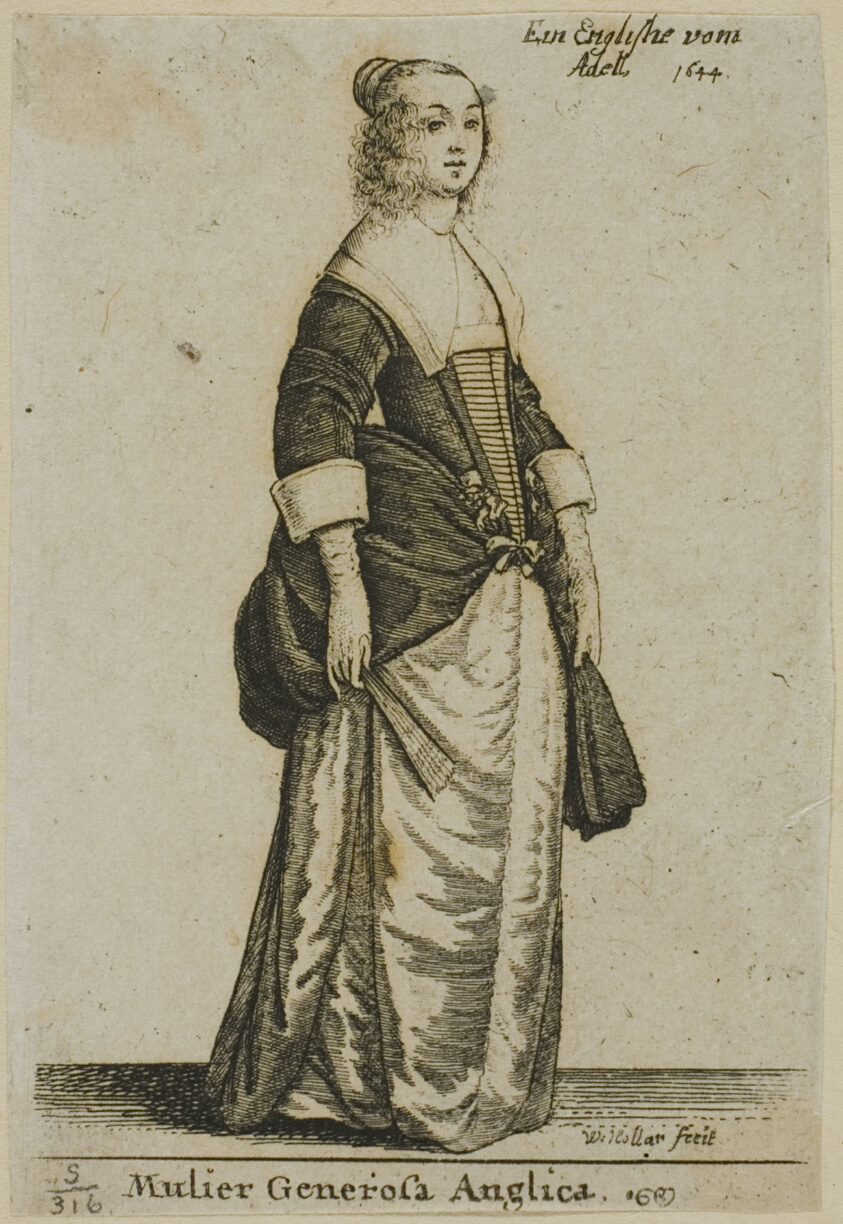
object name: Print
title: English Gentlewoman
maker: Wenceslaus Hollar (Bohemian, 1607-1677)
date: 1644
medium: Etching on gray Asian paper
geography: Bohemia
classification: etching; print; prints and drawing